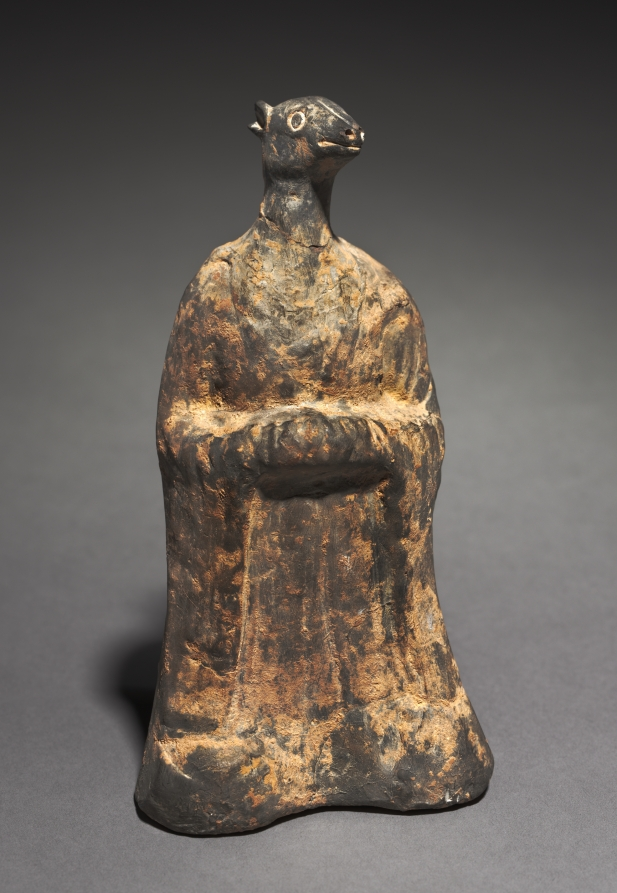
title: Mortuary Figure of the Zodiac Sign: Hare (Cancer)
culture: China, Northern Wei dynasty (386-534)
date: 500s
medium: gray earthenware with traces of slip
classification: Sculpture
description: The twelve-animal zodiac series—rat, ox, tiger, rabbit, dragon, snake, horse, goat, monkey, rooster, dog, and boar—signifies a traditional Chinese concept of time structured in a cyclical order. The twelve animals are also linked to the art of fortune-telling that underlies human existence in connection with the changes of the universe. The use of the twelve zodiac animals as tomb furniture suggests they provided a cosmological structure for the afterlife.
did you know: At some point in the past, both right and left ears were broken off close to the figure's head.